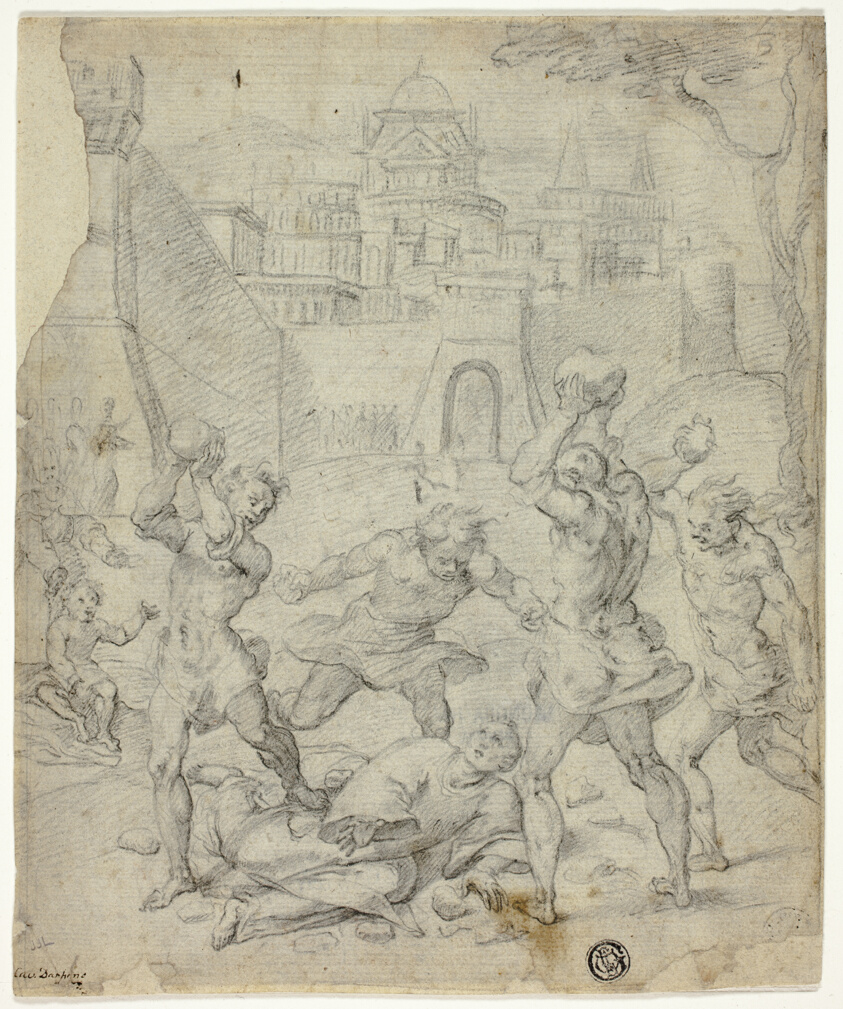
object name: Drawing and Watercolor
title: Stoning of Staint Stephen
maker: Unknown Artist; Italian, Rome or North Italian, late 16th centlury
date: c. 1600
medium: Black chalk on tan laid paper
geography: Italy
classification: chalk; drawings (visual works); prints and drawing